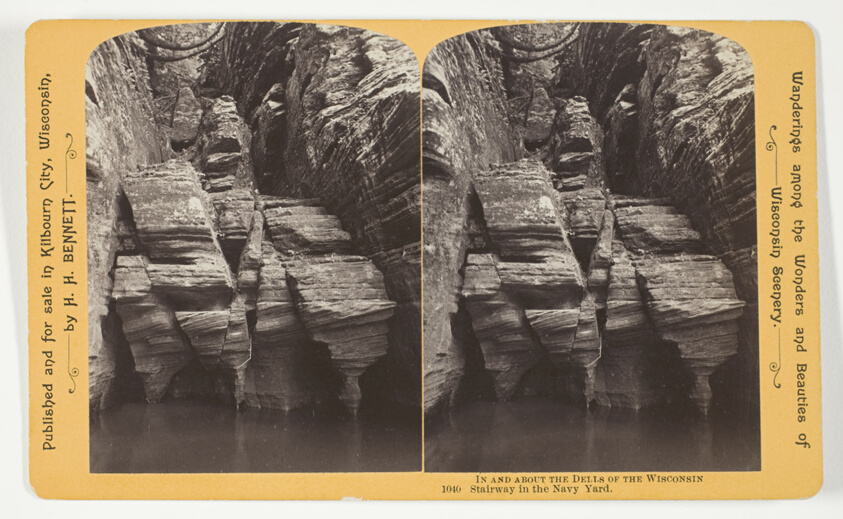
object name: Photograph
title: Stairway in the Navy Yard, No. 1040 from the series "In and About the Dells of the Wisconsin River"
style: 19th century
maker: Henry Hamilton Bennett (American, born Canada, 1843-1908)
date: 1870/1908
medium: Albumen print, stereo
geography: Wisconsin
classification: photography; photograph; albumen silver print; stereograph (albumen)